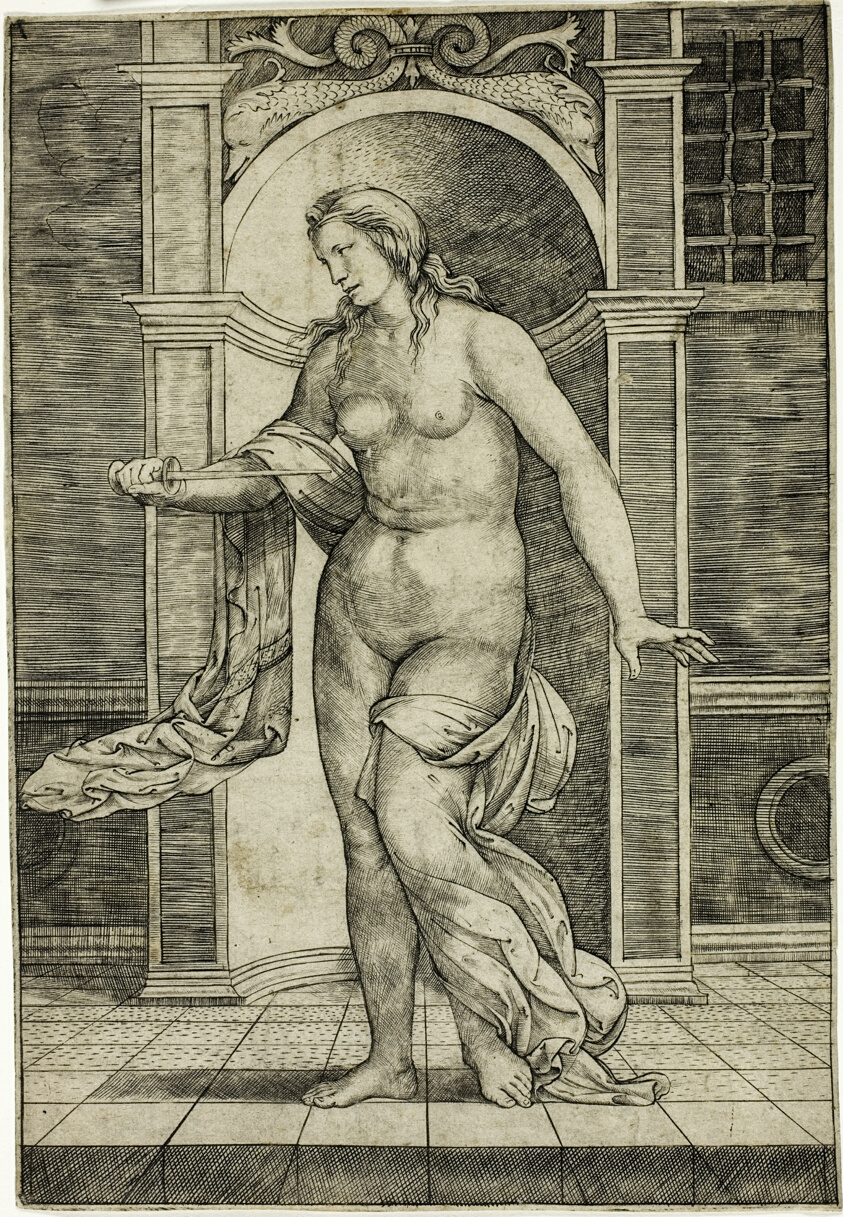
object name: Print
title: Lucretia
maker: Jacopo Francia (Italian, before 1486–1557)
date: c. 1510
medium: Engraving in black on ivory laid paper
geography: Italy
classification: print; prints and drawing